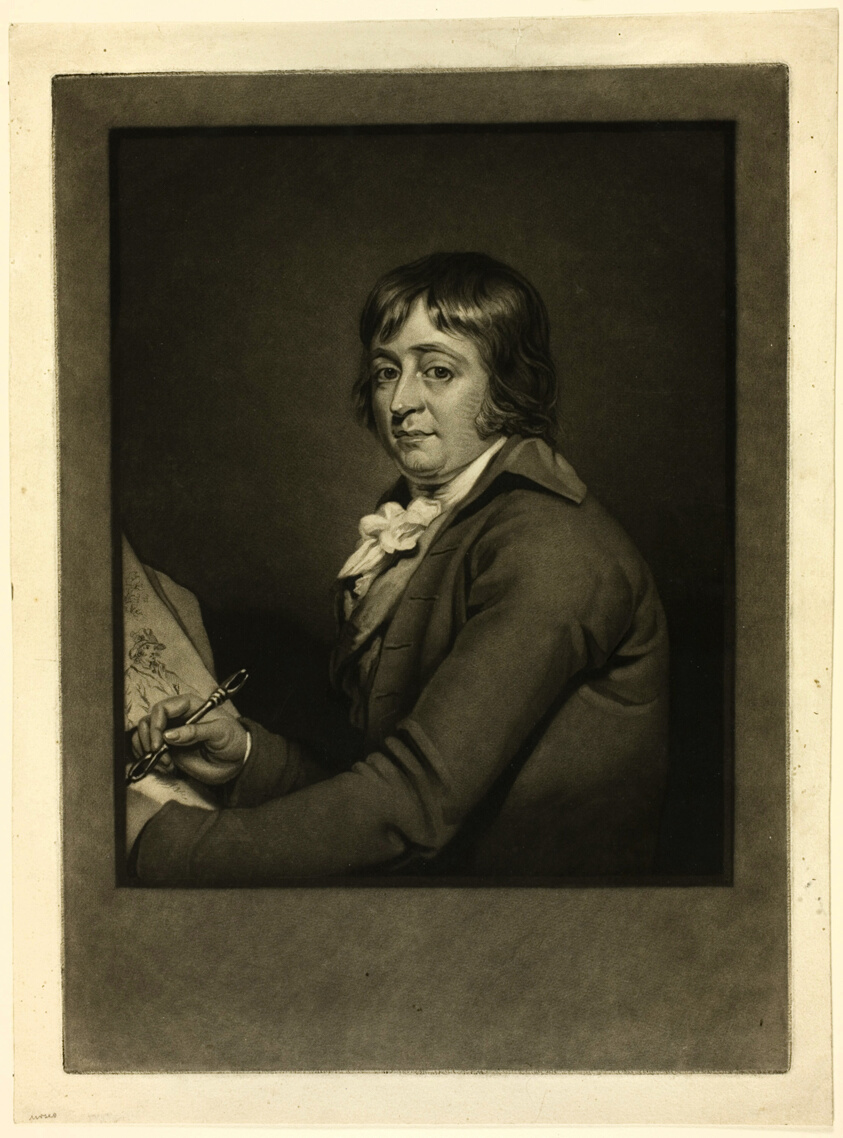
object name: Print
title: Mosland, Glo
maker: Attributed to William Ward; English, 1800-1840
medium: Mezzotint on paper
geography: England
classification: mezzotint; print; prints and drawing